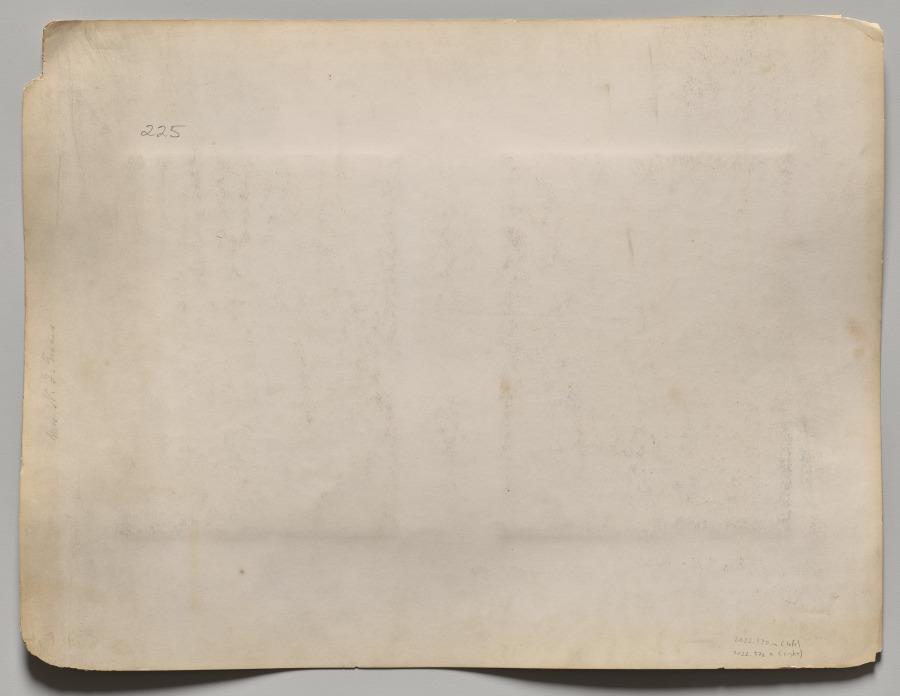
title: Left: [Ashoka Pillar moved to its present position by Feroz Shah]. Right: Memorial Monument of the British Soldiers in 1859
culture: England, 19th century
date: 1870s-1880s (?)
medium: 2 albumen prints mounted on an album page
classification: Photograph